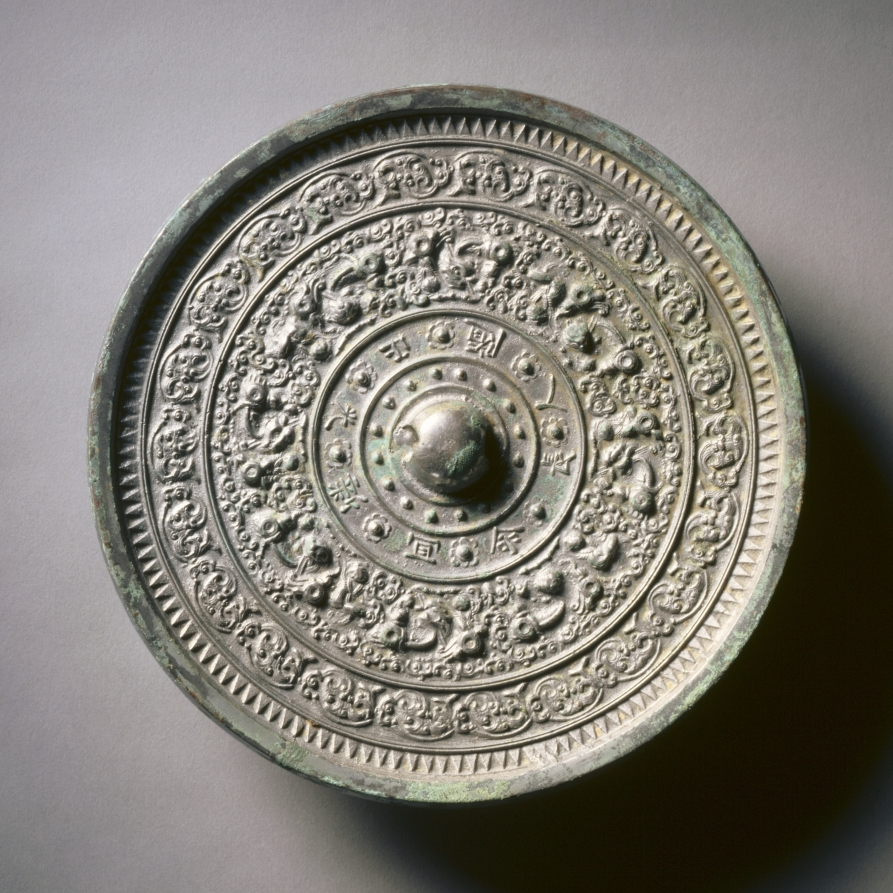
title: Mirror with Deities and Animals in Concentric Circles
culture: China, Sui dynasty (581-618)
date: late 500s–early 600s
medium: bronze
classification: Metalwork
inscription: The mirror's light shows the man inside./ May you live a long life and [constantly] renew yourself.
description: Inscription: The mirror's light shows the man inside. May you live a long life and [constantly] renew yourself.